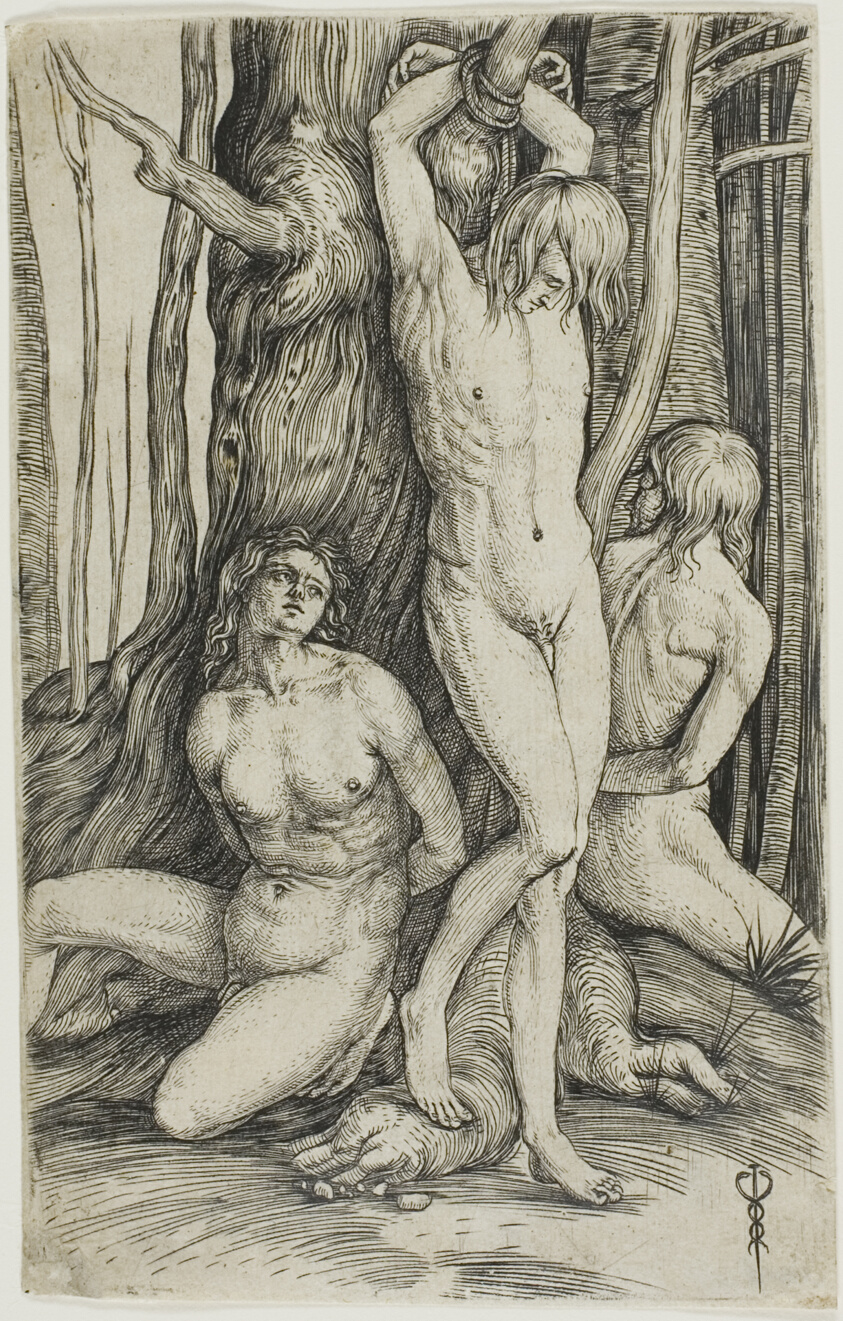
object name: Print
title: Three Captives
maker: Jacopo de' Barbari (Italian, 1460/70-before July 1516)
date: c. 1505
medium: Engraving on cream laid paper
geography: Italy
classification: engraving; print; prints and drawing